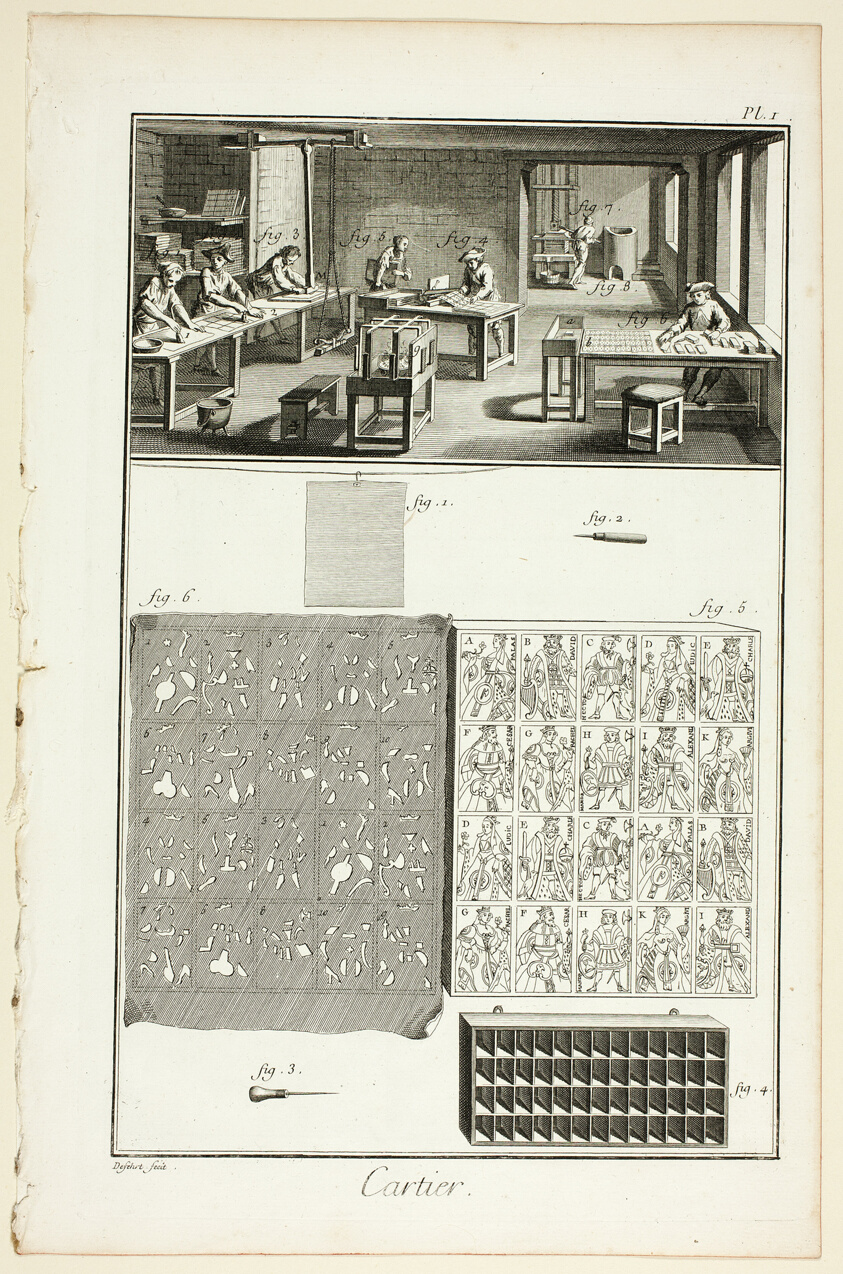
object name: Print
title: Card-Maker, from Encyclopédie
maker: A. J. Defehrt (French, active 18th century); published by André le Breton (French, 1708-1779), Michel-Antoine David (French, c. 1707-1769), Laurent Durand (French, 1712-1763), and Antoine-Claude Briasson (French, 1700-1775)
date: 1762/77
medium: Engraving on cream laid paper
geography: France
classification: etching; print; prints and drawing